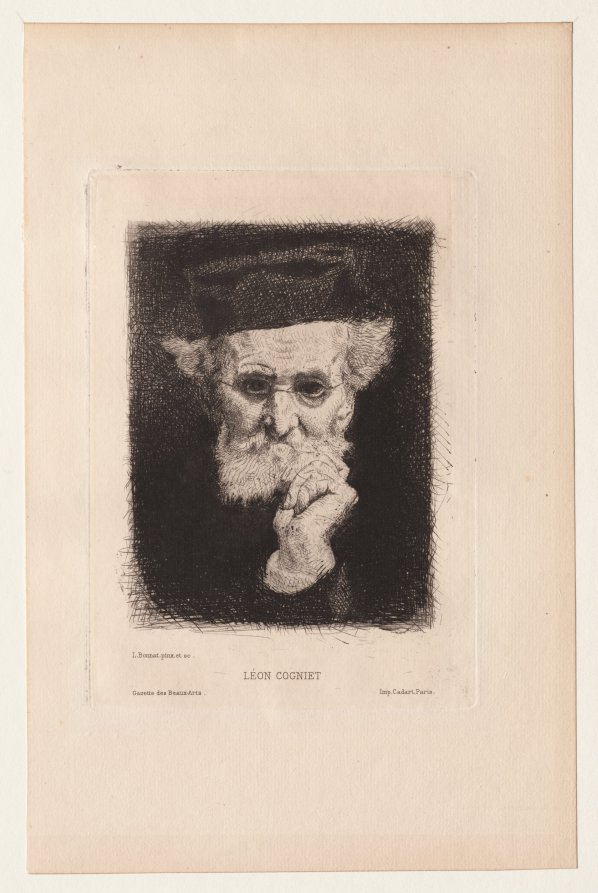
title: Léon Cogniet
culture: France, 19th century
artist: Léon Bonnat (French, 1833–1922)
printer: Alfred Cadart (French, 1825–1875)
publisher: Gazette des Beaux Arts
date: 1881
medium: etching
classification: Print